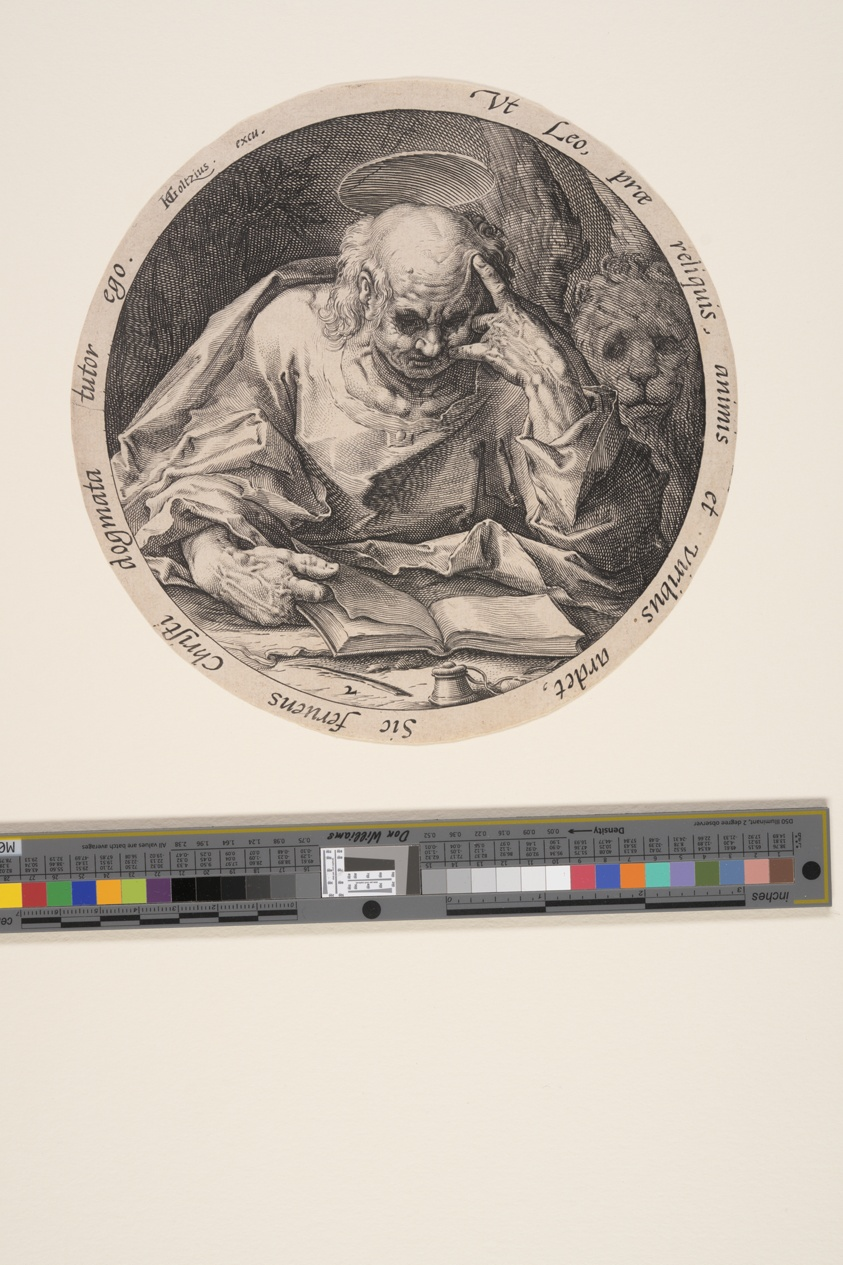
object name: Print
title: Mark, from The Evangelists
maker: Jacques de Gheyn II (Dutch, 1565–1629); after Hendrick Goltzius (Dutch, 1558–1617)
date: 1588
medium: Engraving on laid paper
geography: Netherlands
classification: engraving; paper; print; prints and drawing